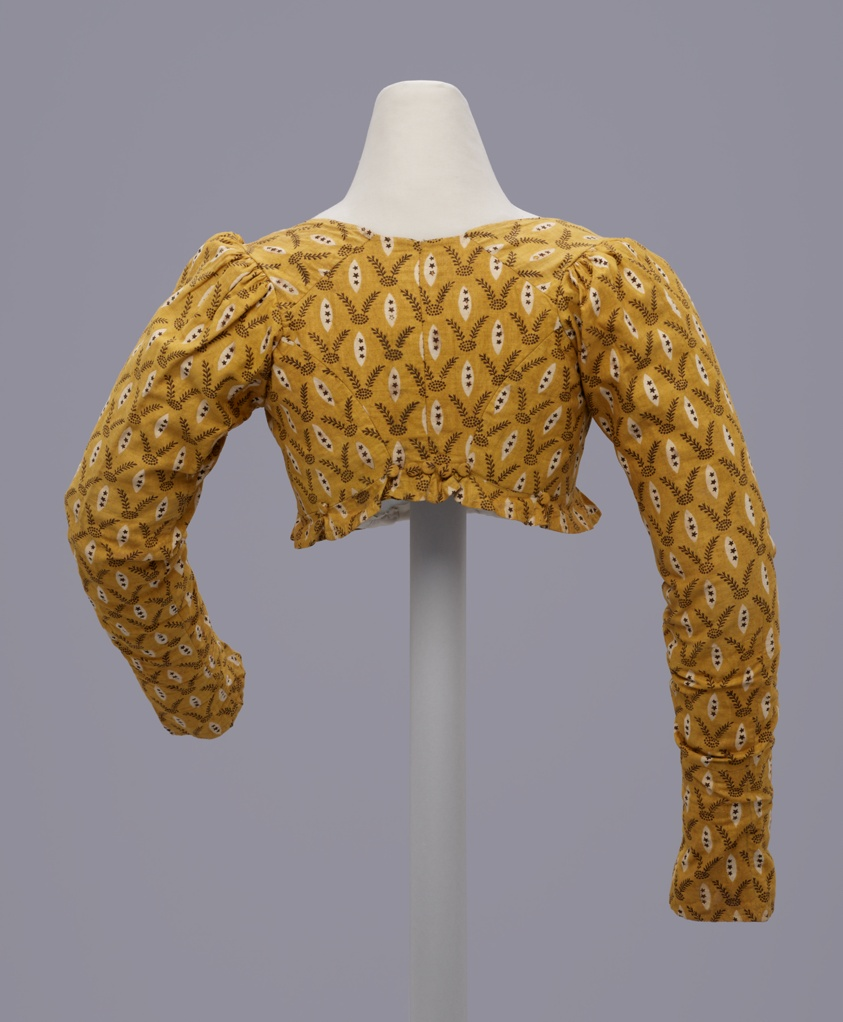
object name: Costume and Accessories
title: Woman's Spencer jacket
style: 17th Century, 18th Century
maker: France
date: c. 1800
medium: Cotton, plain weave, hand-block printed; cotton lining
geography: France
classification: dress (garment); costume - printed; costume - weaving; clothing; garment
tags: lattices, floral, stars, clothing